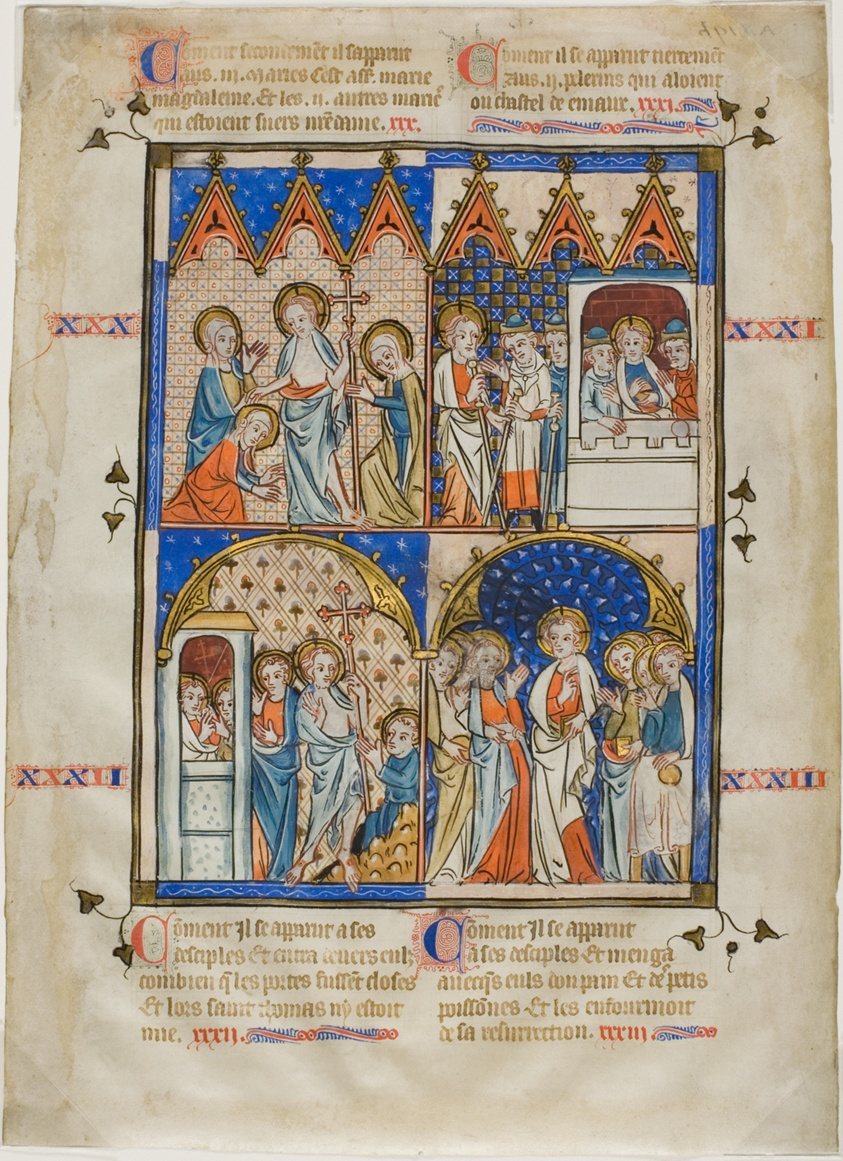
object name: Drawing and Watercolor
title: Leaf from a Picture Cycle: Christ Appearing to the Three Marys, Christ and the Pilgrims on the Road to Emmaus, Doubting Thomas, and Christ Appearing to the Apostles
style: medieval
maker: French Painter, active in Northern France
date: 1325/50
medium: Opaque watercolor, pen and brown, red, blue and black ink, with shell gold and gold leaf on parchment.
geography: France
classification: tempera; manuscript; drawings (visual works); prints and drawing